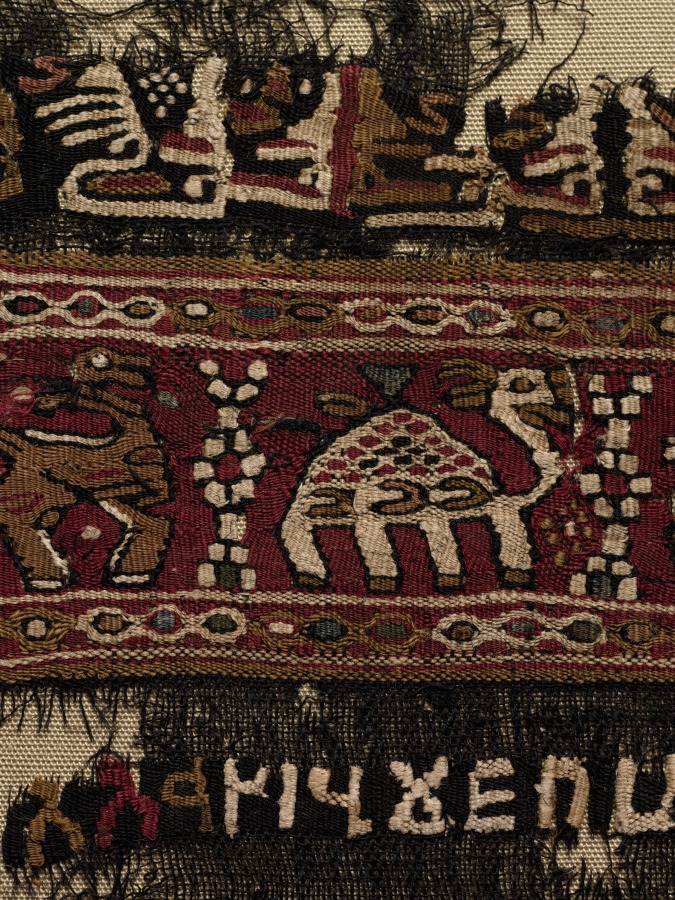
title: Decorated ends of a shawl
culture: Egypt, Fayyum, Tulunid or Ikshīdid period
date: 770–887 (radiocarbon date, 95.4% probability)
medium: Wool, linen, and silk: plain weave with inwoven tapestry weave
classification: Textile